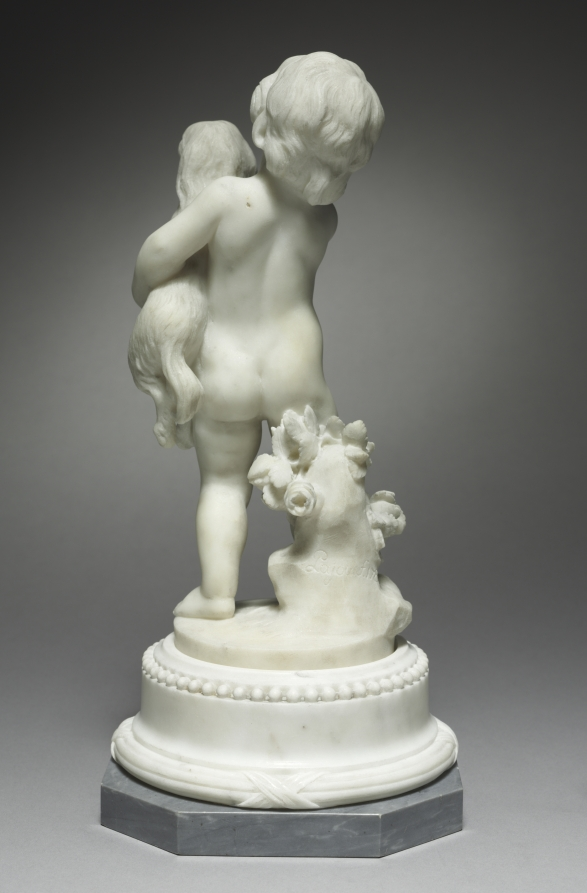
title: Faithful Love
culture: France, 19th century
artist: after Augustin Pajou (French, 1730–1809)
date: 1800s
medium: marble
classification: Sculpture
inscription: signature behind stump with roses: Pajou f(ecit) 1787.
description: These statuettes represent the opposing spectrums of love—fickle and faithful—both portrayed by Cupid. Fickle Love absent-mindedly plays with a butterfly, a symbol of the fleeting moment. Conversely, Faithful Love is accompanied by a dog, the ultimate loyal companion. These works were originally believed to be by the hand of Augustin Pajou, because the works are signed and he made nearly identical sculptures. However, due to the slightly clumsy execution and the awkward scale of the signatures, the museum now believes the statuettes were created by another artist after Pajou's design.